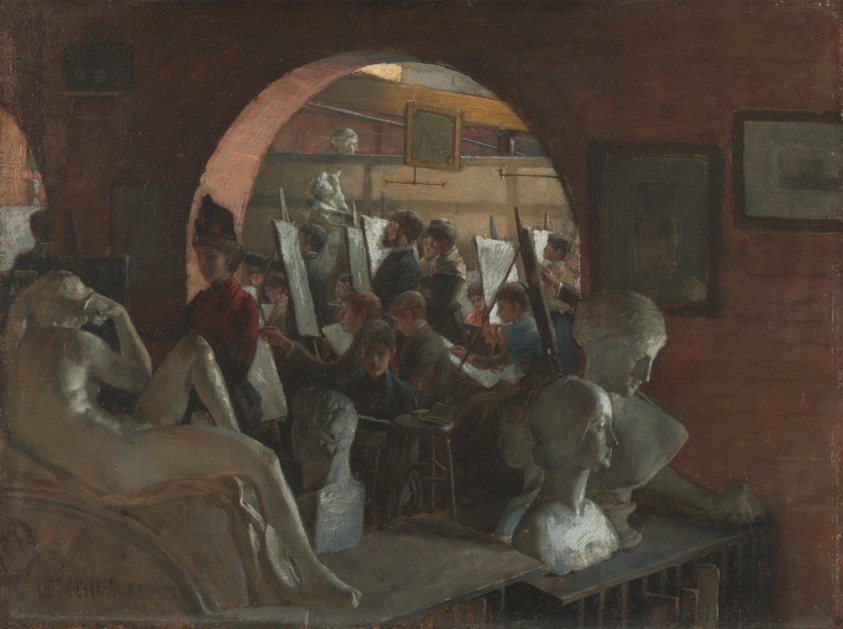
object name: Painting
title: An Alcove in the Art Students' League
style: Impressionism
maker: Charles Courtney Curran (American, 1861–1942)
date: 1888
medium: Oil on canvas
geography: New York City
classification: painting; american arts